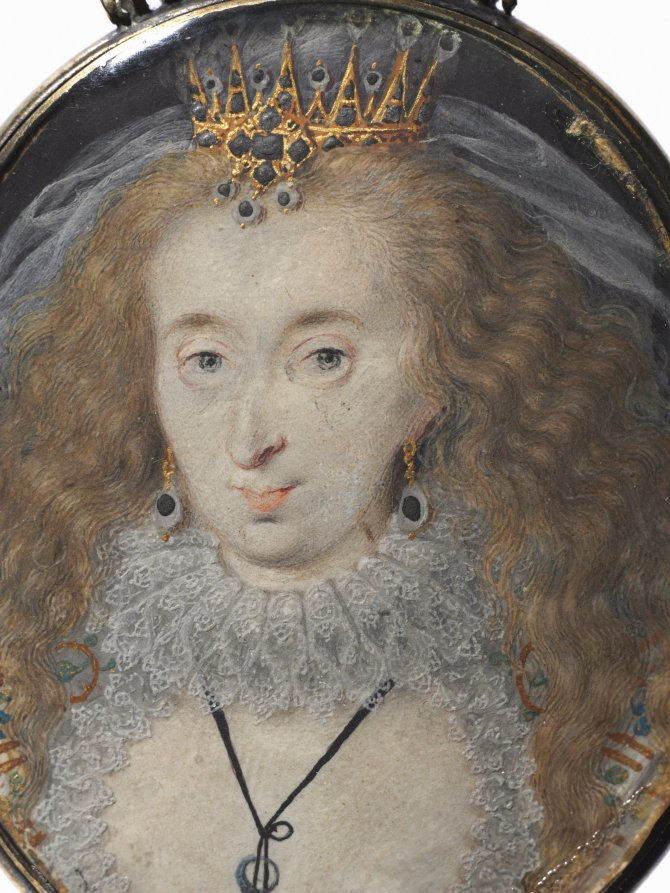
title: Portrait of Lucy Russell, Countess of Bedford, née Harrington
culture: England, early 17th century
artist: Isaac Oliver (French, c. 1565–1617)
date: c. 1608–1616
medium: watercolor on vellum with gold and silver in a 17th-century silver gilt frame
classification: Portrait Miniature